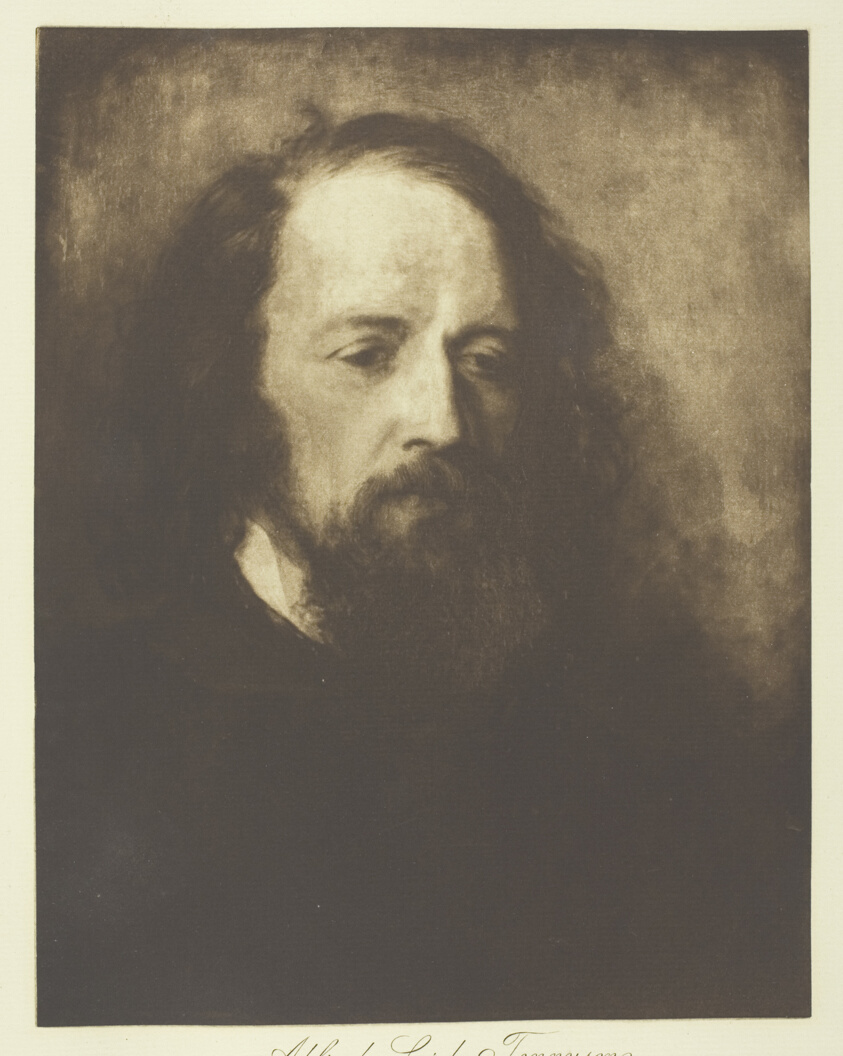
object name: Photograph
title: Alfred, Lord Tennyson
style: 19th century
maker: Henry Herschel Hay Cameron (English, 1852–1911); after George Frederick Watts (English, 1817–1904)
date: c. 1893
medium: Photogravure, plate 2 from the album "Lord Tennyson and his Friends" (1893)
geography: England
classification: photogravure; photomechanical process; photography; photograph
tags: Collected by Hugh Edwards, Lord Tennyson and His Friends